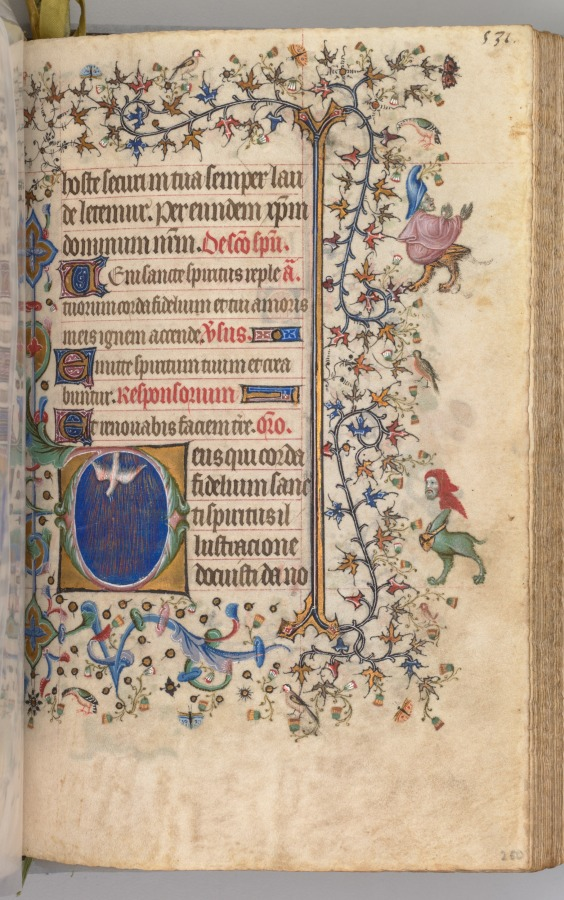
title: Hours of Charles the Noble, King of Navarre (1361-1425): fol. 260r, Holy Spirit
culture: France, Paris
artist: Master of the Brussels Initials and Associates (French)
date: c. 1405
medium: ink, tempera, and gold on vellum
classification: Bound Volume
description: This precious volume was obviously highly prized by its owner, the French-born King of Navarre, who had his coat of arms painted on no less than twenty folios. Rather than directly commissioning this manuscript from a specific workshop, it seems that Charles the Noble acquired his book of hours -- perhaps ready-made for the luxury market -- while on a trip to Paris in 1404-05. A collaborative effort, six painting styles are evidenced within the pages of this codex, those of two Italians, two Frenchmen, and two Netherlanders. The painter who was responsible for the planning and decoration of the book, and who produced seventeen of the large miniatures, was a Bolognese artist known as the Master of the Brussels Initials. His principal assistant, responsible for most of the borders, was a Florentine who signed his name "Zecho" da Firenze on folio 208 verso.